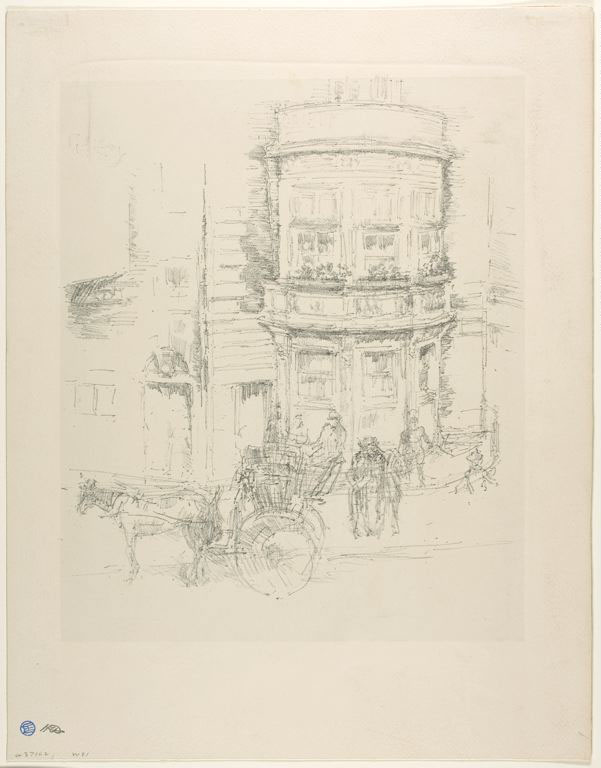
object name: Print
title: Back of the Gaiety Theatre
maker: James McNeill Whistler (American, 1834-1903)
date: 1895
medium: Lithograph on white wove paper, laid down on white wove paper (chine collé)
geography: United States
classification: lithograph; prints and drawing; print; paper